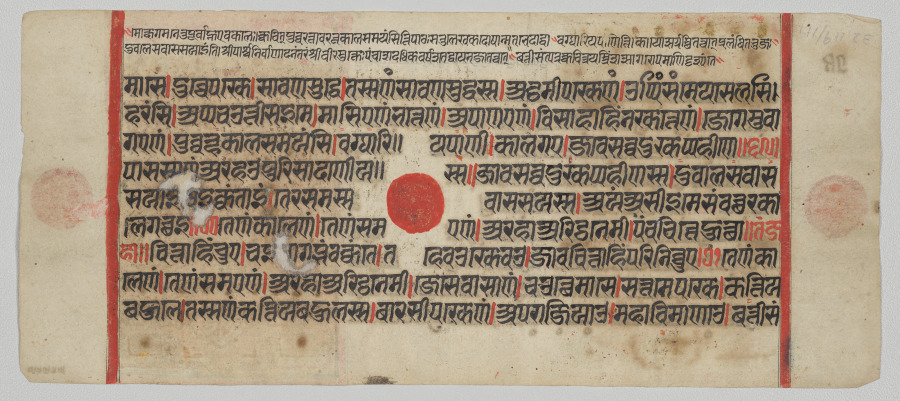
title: Text, Folio 48 (recto), from a Kalpa-sutra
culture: Western India, Gujarat, last quarter of the 15th century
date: c. 1475–1500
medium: Gum tempera, ink, and gold on paper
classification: Painting